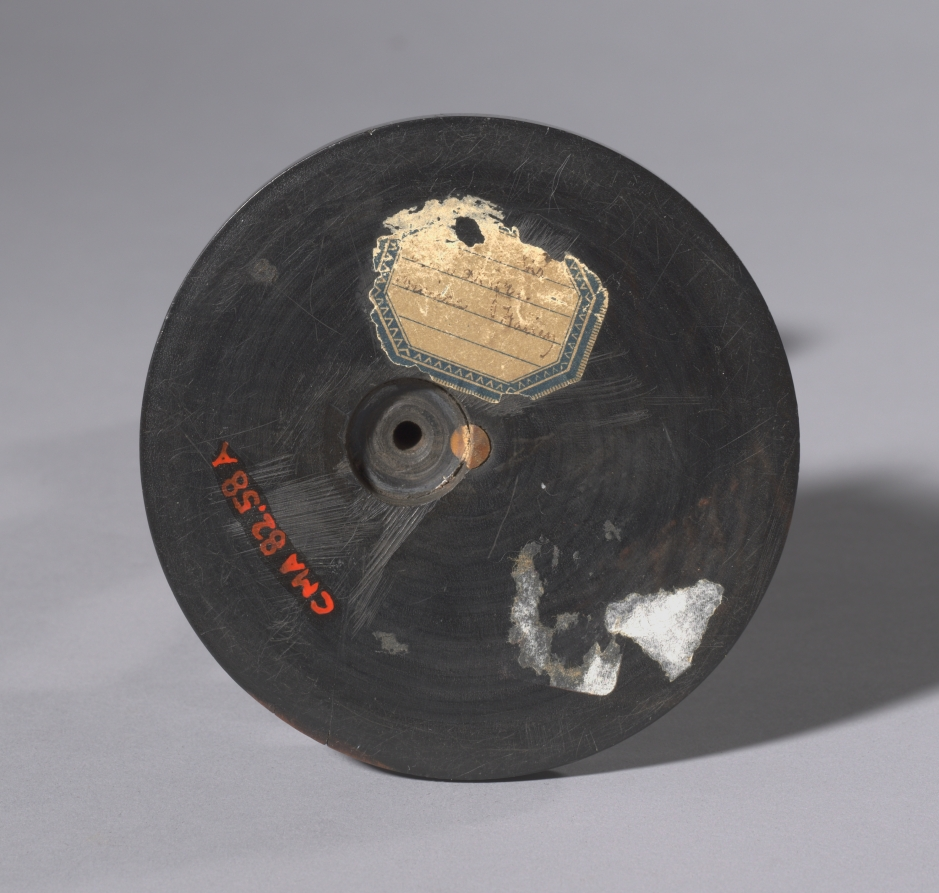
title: Eve Expelled from Paradise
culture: Germany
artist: Leonhard Kern (German, 1588–1662)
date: c. 1640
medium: wood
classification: Sculpture